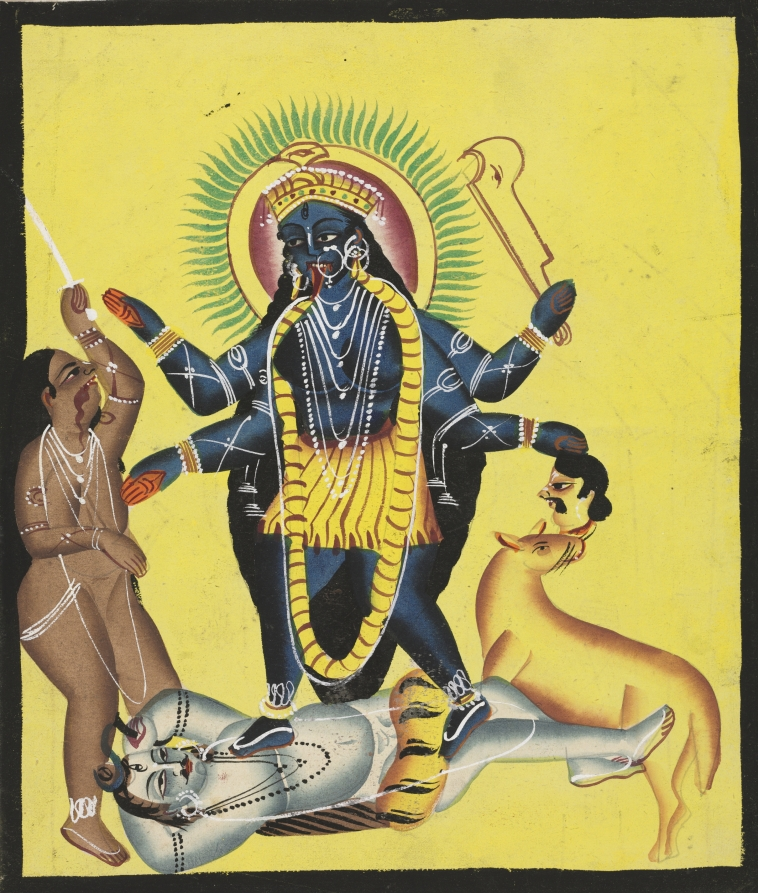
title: Kali Standing on Shiva (verso), from a Kalighat album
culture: Eastern India, Bengal, Kolkata, Kalighat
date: c. 1890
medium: Gum tempera, graphite, and ink on paper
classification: Painting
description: Black-skinned, four-armed, her tongue out, and blood dripping from her mouth, Kali has a third eye—representative of enlightened or divine knowledge—on her forehead. Simultaneously benevolent and dangerous, she holds a sword and a demon’s severed head in two hands while the other two hands are in gestures of protection and blessing. This image would have been sold as a pilgrim souvenir to both locals and the colonial British around the Kalighat temple and is a replica of the image worshipped inside the temple. The frightening image of Kali especially fit into the colonial imagination and into Victorian popular culture and would have been an iconic souvenir/artifact to be shown to intrigued and horrified friends at home in England.